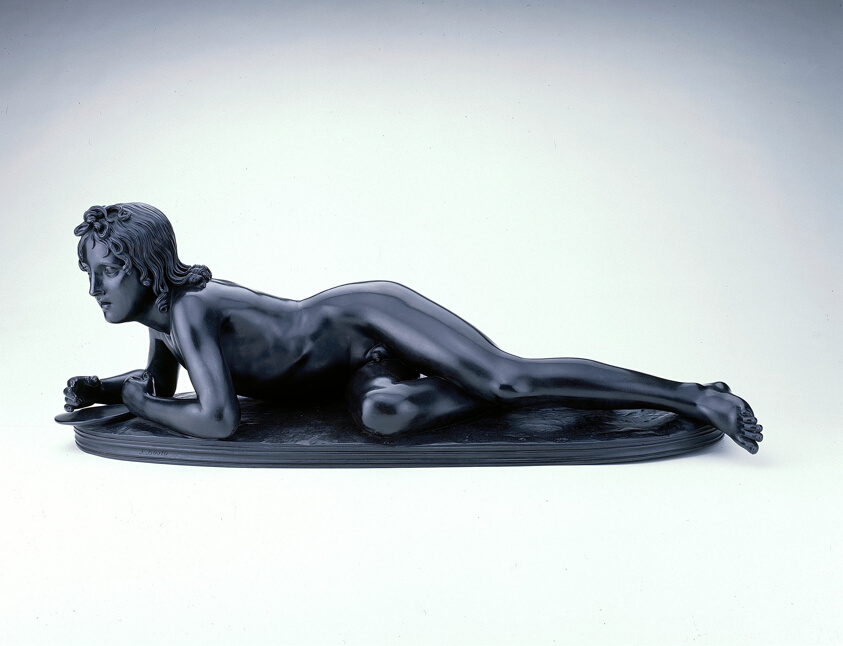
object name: Sculpture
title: Hyacinth Awaiting His Turn to Throw the Discus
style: nineteenth century, 19th century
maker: François-Joseph Bosio (French, 1768-1845)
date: c. 1824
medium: Bronze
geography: France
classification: large scale; french; bronze; sculpture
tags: Greek mythology, nudes, youth, man, Greek, mythical, mythological figures, mythology